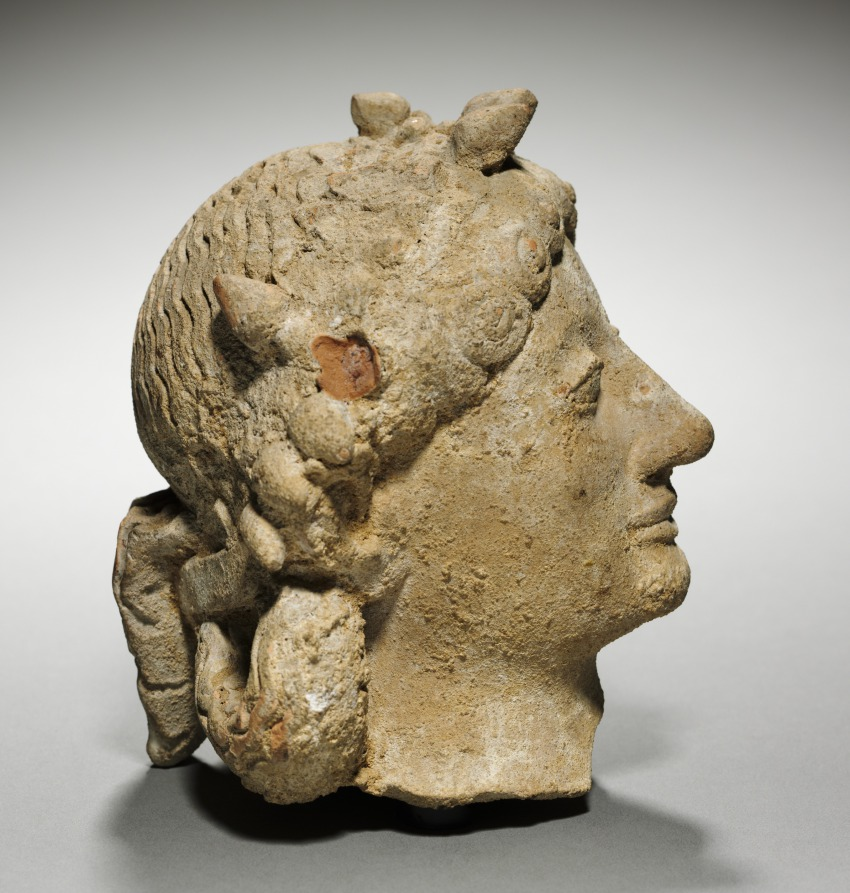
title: Head of Artemis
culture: Greece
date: 600–575 BCE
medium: terracotta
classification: Sculpture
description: Artemis was the goddess of hunting. Her long straight nose, almond-shaped eyes, and "archaic smile" are very similar to those of Atalanta on the contemporary white-ground lekythos (1966.114)